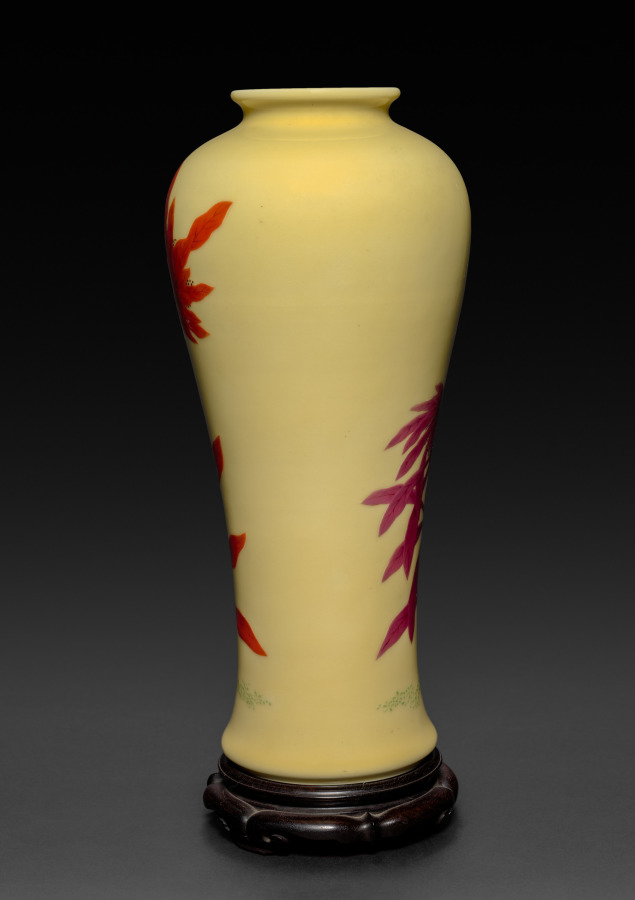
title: Prunus Vase with Amaranth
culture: Japan, Taishō period (1912–26)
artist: Seifū Yohei IV (Japanese, 1872–1951)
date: 1914–46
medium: Porcelain with yellow glaze and overglaze color enamel and gold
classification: Ceramic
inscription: 清風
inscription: 渡邊所藏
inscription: 清風造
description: Yohei IV’s interest in bold, colorful designs is on full display in this vase shaped like a “prunus vase,” or meiping (Japanese meipin). It has two colors of amaranthus on a yellow ground. It follows a design appearing on a sleeve-shaped vase by Yohei III. Yohei IV uses bright spring-green dots of overglaze enamel to suggest a ground plane in his yellow environment; he also uses red and magenta accented with wild gold cascades of dots for two plants he places on opposite sides of the vase, one much larger than the other. In Yohei III’s version, the body of the vessel is white, and the foliage of one plant is red with carefully painted veins in gold, while another plant strategically positioned behind it has a deep rust color, again carefully detailed in gold. In a sense, Yohei IV has deconstructed his father’s logical, balanced design and re-presented it as an emotive, lightheartedly chaotic one that sates the appetite for instant gratification, much as his father’s creation rewards the pursuit of elegance.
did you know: Seifū Yohei IV continued to create works in the studio’s signature colors but also produced pieces with strong color and flare that were his interpretations of Qing dynasty (1644–1911) glazes.